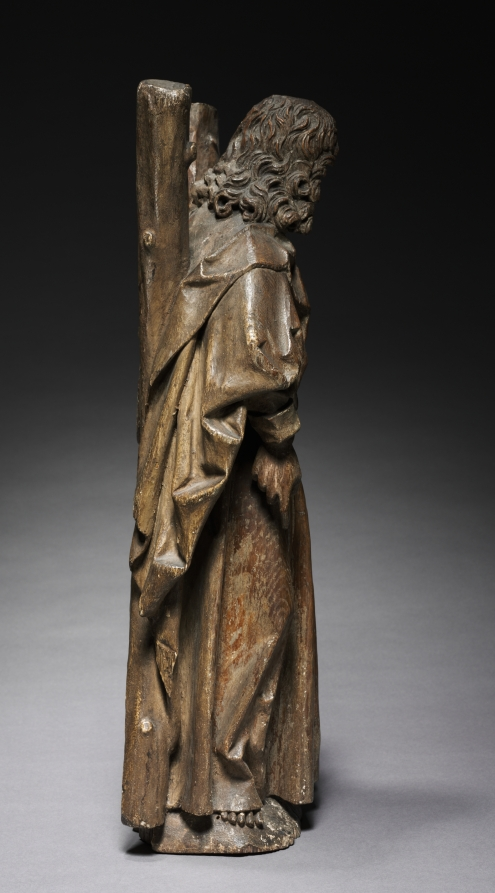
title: Saint Andrew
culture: Netherlands, Elsloo, 16th century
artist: circle of Master of Elsloo (Netherlandish)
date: c. 1515–20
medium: oak with traces of paint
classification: Sculpture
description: Apostle figures such as this were made in large numbers in the eastern Netherlands during the early 1500s. This figure of Saint Andrew, identified by his X-shaped cross, was undoubtedly a single figure from an apostle series. It may have been used above a choir stall in a church, or else part of an apostelbalk, a wooden beam with a figure of Christ at the center. These beams were mounted high above the interior of the church to separate the nave (used by lay people) from the sanctuary, accessible only to the clergy. The artist is named after a multicolored group of Saint Anne with the Virgin and Child, now in the Augustinuskerk in Elsloo, the Netherlands. The sculptor is probably Jan van Oel, who was working in and around Roermond in about 1500–1520. Most of the sculptures attributed to this master are in churches in Belgium and Dutch Limburg and in the neighboring German region.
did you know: Traces of paint found on this sculpture suggest that at one point it was painted.